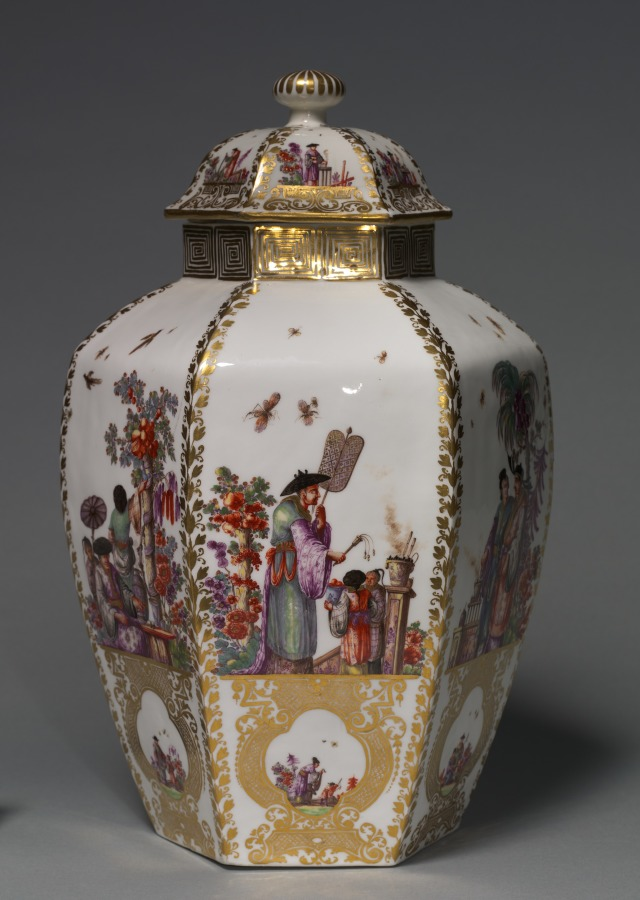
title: Covered Vase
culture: Germany, Meissen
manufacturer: Meissen Porcelain Factory (German, est. c. 1710)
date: c. 1728–30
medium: porcelain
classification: Ceramic